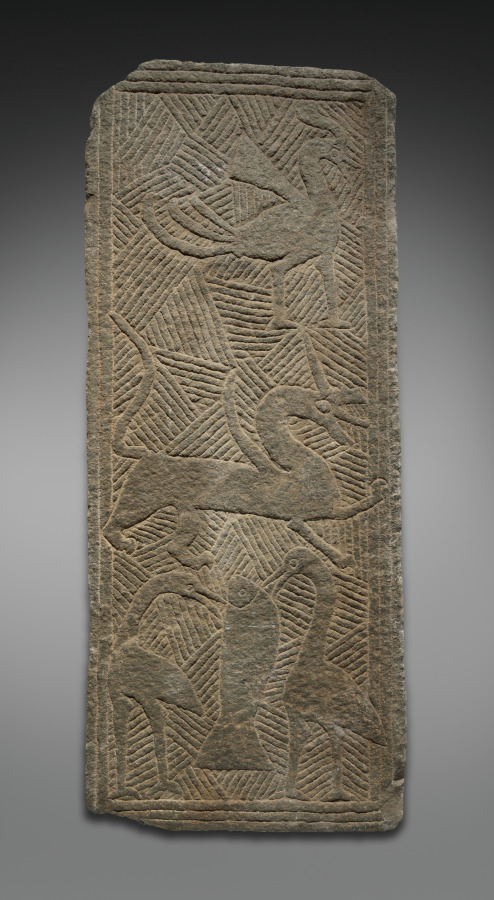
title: Relief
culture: China, Sichuan province, Han dynasty (202 BCE–220 CE)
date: 206 BCE–220 CE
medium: stone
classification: Sculpture